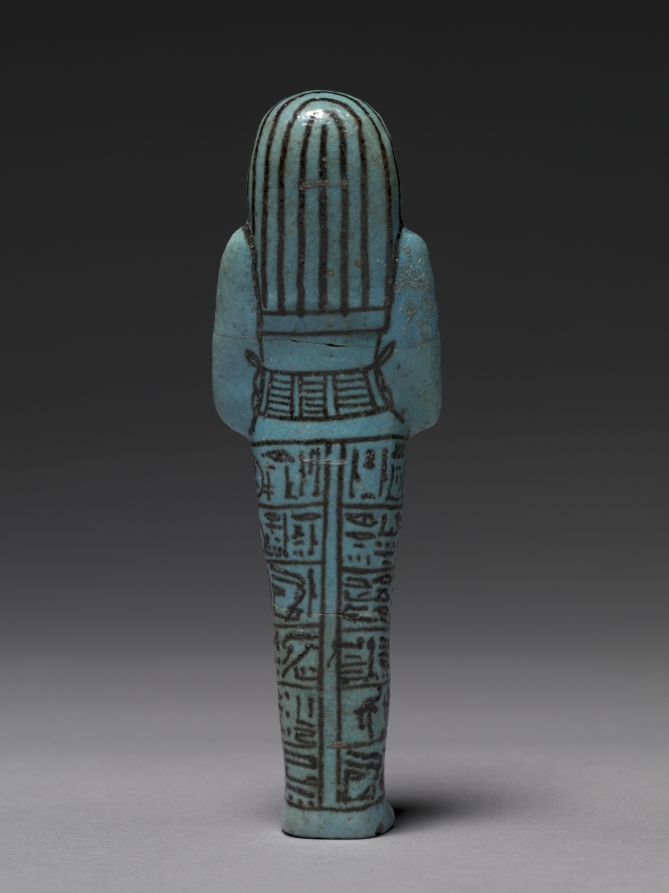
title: Shawabty of Seti I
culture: Egypt, Thebes, New Kingdom, Dynasty 19, reign of Seti 1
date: c. 1294–1279 BCE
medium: medium blue faience with black decoration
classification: Funerary Equipment